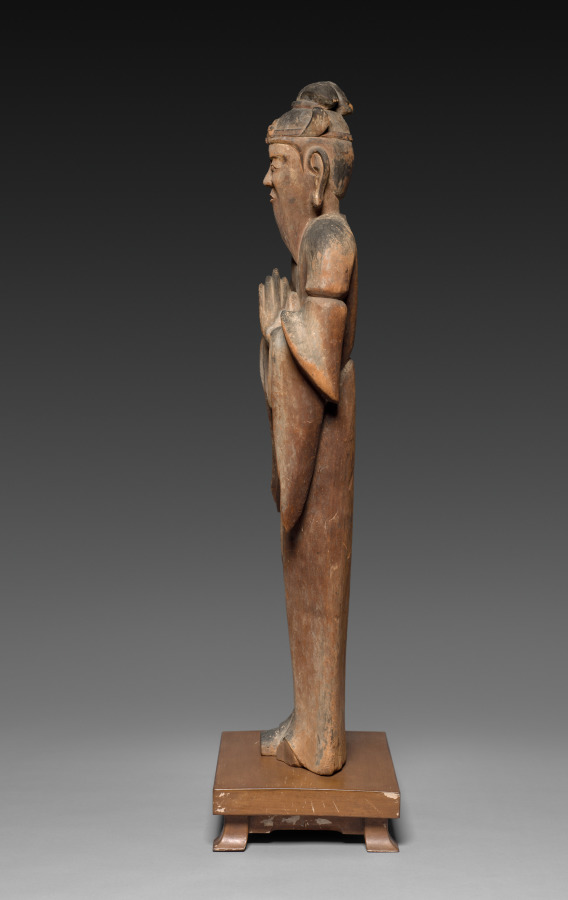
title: Deity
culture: Japan, Heian period (794–1185)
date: 1100s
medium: Magnolia wood with traces of color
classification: Sculpture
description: This unidentified sculpture represents a mature male figure with a long beard. His robes, crown-like head ornament, and hair arranged into a topknot resemble the attire and styling of members of the heavenly realm—tenbu in Japanese—of the Buddhist cosmos. The comparatively simple design, along with carving marks purposely left by the sculptor throughout the surface tend to be associated with sculptures of kami, deities venerated at shrines, or jinja.